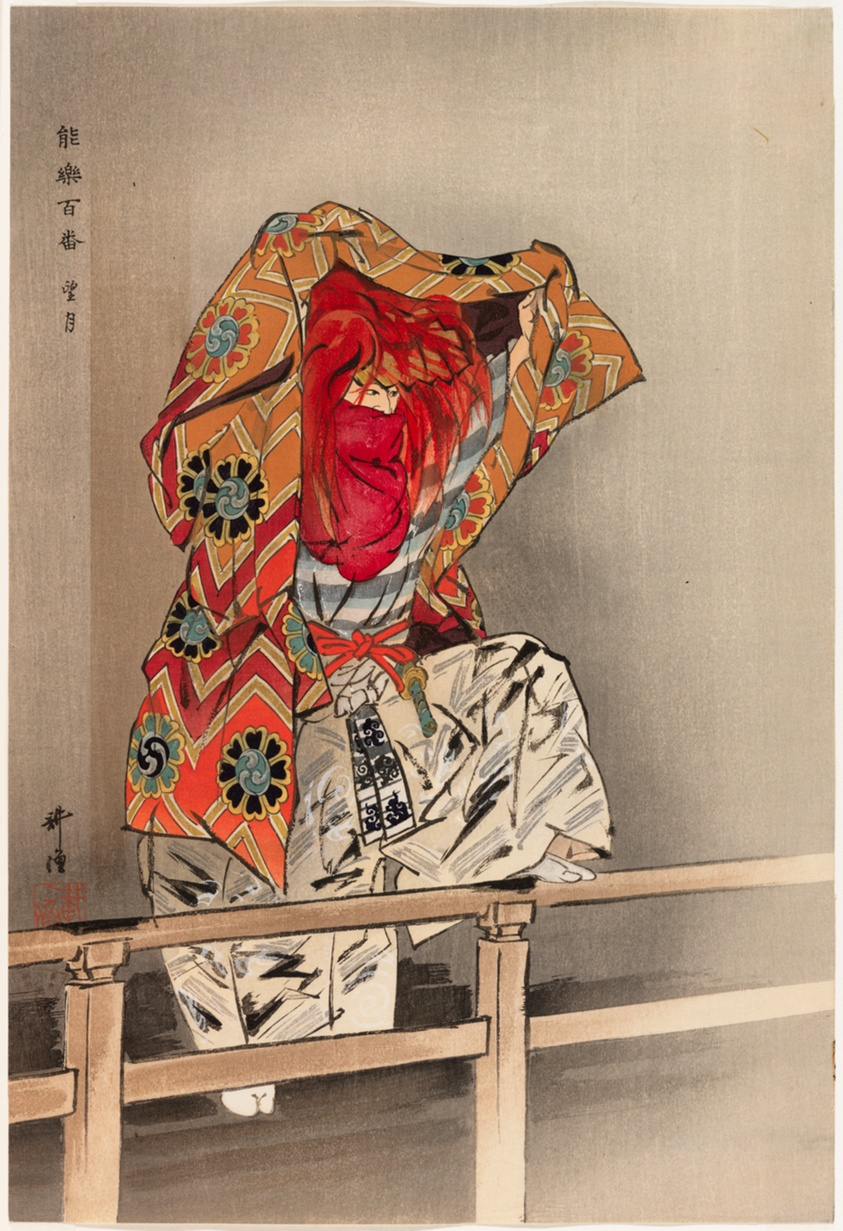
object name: Print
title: Mochizuki, from the series "One Hundred No Dramas (Nogaku hyakuban)"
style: Japanese (culture or style)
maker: Tsukioka Kogyo; Japanese, 1869-1927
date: 1898/1903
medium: Color woodblock print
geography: Japan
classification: woodblock print; print; asian art